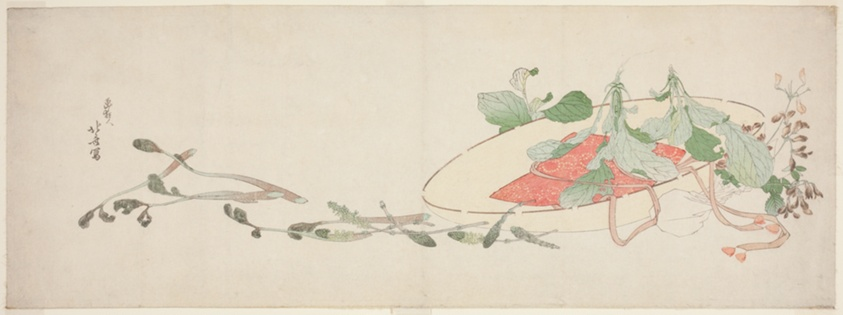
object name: Print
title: Flowers and spring greens in a hat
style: Japanese (culture or style)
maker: Katsushika Hokusai 葛飾 北斎; Japanese, 1760-1849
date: c. 1801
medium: Color woodblock print; ebangire, surimono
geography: Japan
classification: woodblock print; print; asian art